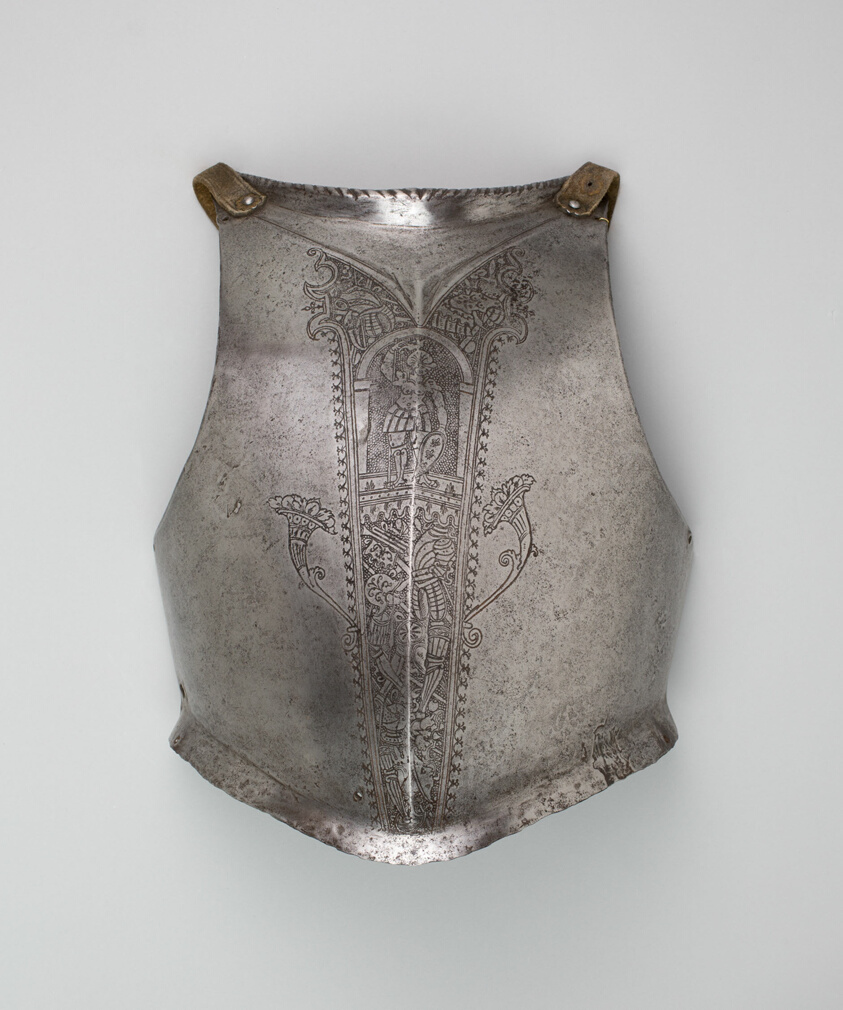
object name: Armor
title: Breastplate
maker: Northern Italian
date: c. 1560/70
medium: Steel, etched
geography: Northern Italy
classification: suit-element; armor; arms and armor